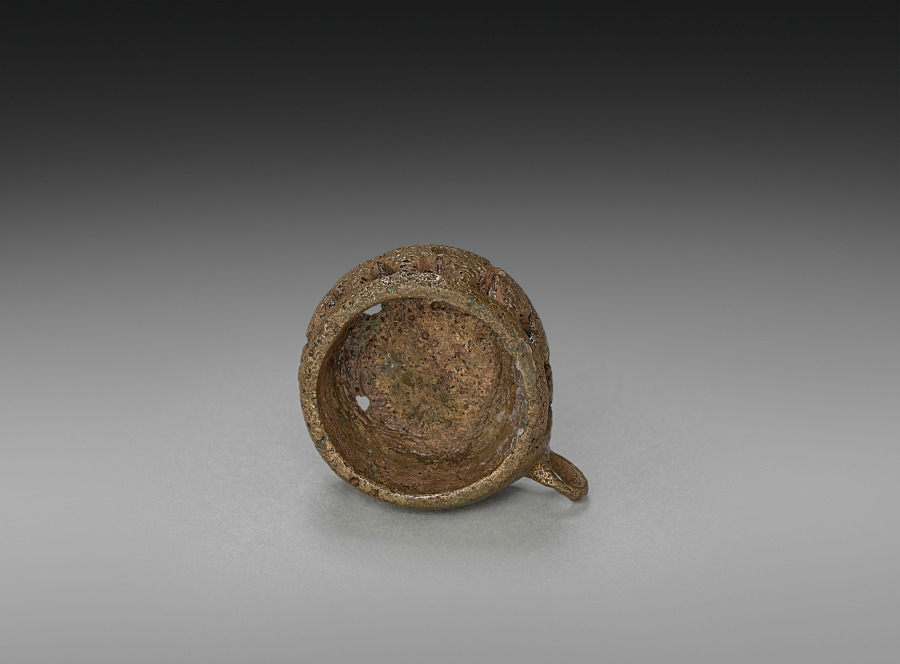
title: Kohl Tube (lid)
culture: Egypt, Greco-Roman period (332 BCE–395 CE), Ptolemaic dynasty (305–30 BCE)–Roman empire (30 BCE–395 CE)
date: 305 BCE–395 CE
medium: brass with blue enamel decoration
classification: Cosmetic Objects